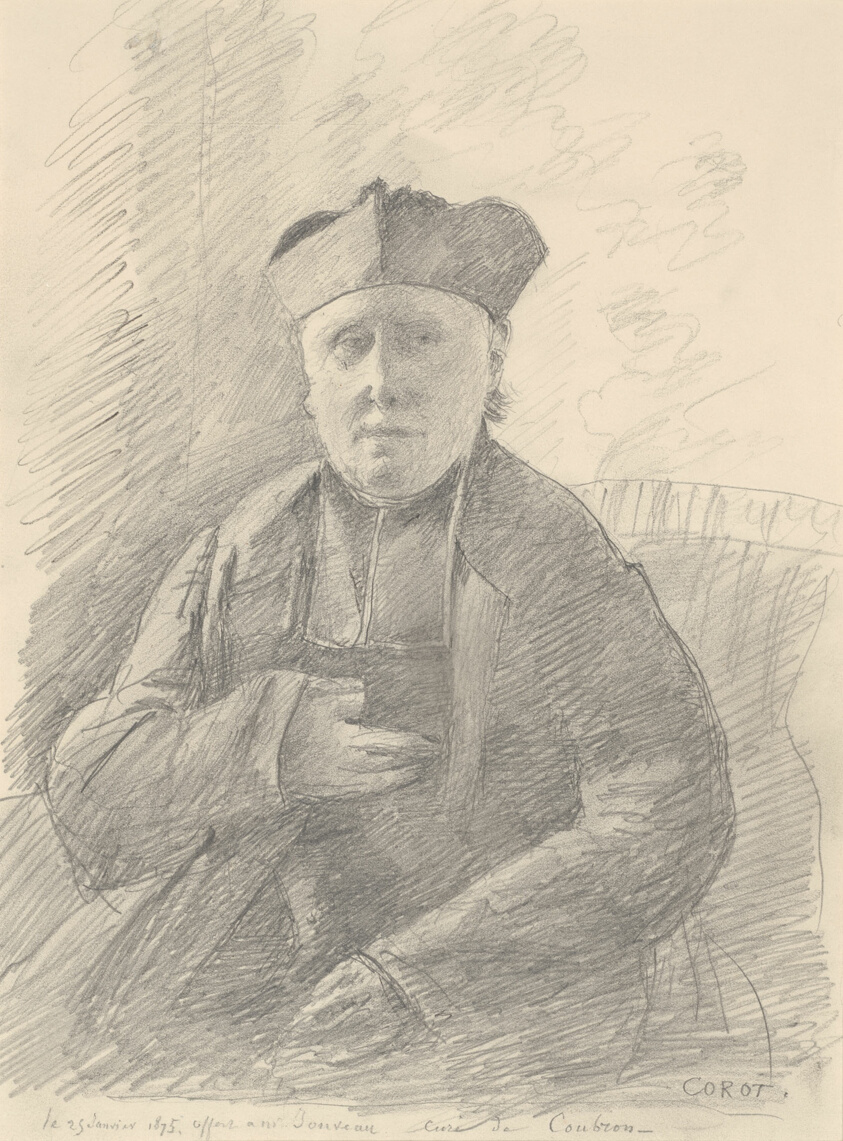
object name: Drawing and Watercolor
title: Portrait of Abbé Jouveau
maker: Jean-Baptiste-Camille Corot; French, 1796-1875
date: 1875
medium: Graphite, with traces of charcoal, on ivory wove paper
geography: France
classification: graphite; drawings (visual works); prints and drawing